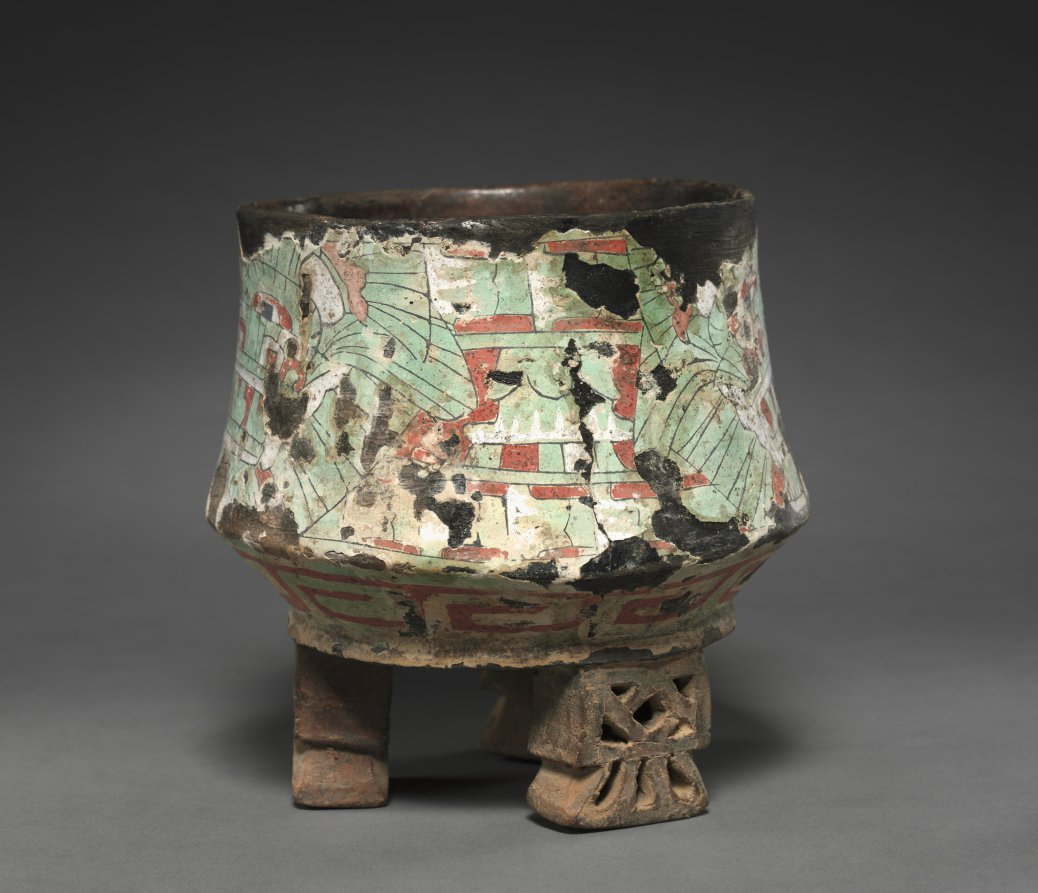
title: Vessel with Butterfly Headdress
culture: Central Mexico, Teotihuacán, Classic period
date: 1–550 CE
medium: ceramic, stucco, pigment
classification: Ceramic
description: The headdress shown on this vessel combines a serpent's mouth with a butterfly's proboscis (feeding tube), which curls between the eyes. The butterfly often appears in the headdress of the Great Goddess, an extremely important Teotihuacán deity. Stucco (paper-thin, painted plaster) is fragile and usually does not survive well; the stucco of the basin in this case has been repaired.